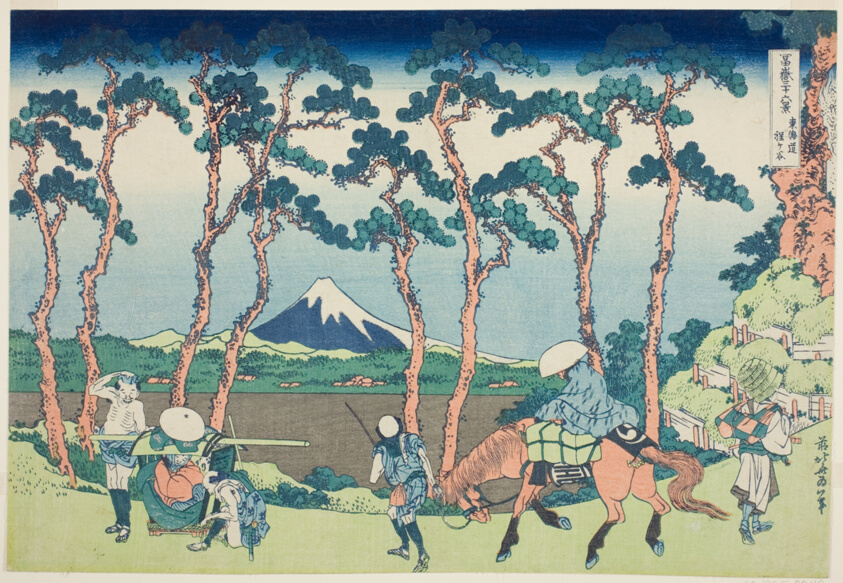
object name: Print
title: Tokaido Hodogaya, from the series "Thirty-six Views of Mount Fuji (Fugaku sanjurokkei)"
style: Japanese (culture or style)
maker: Katsushika Hokusai 葛飾 北斎; Japanese, 1760-1849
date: 1830–33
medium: Color woodblock print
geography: Japan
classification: woodblock print; print; asian art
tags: landscapes